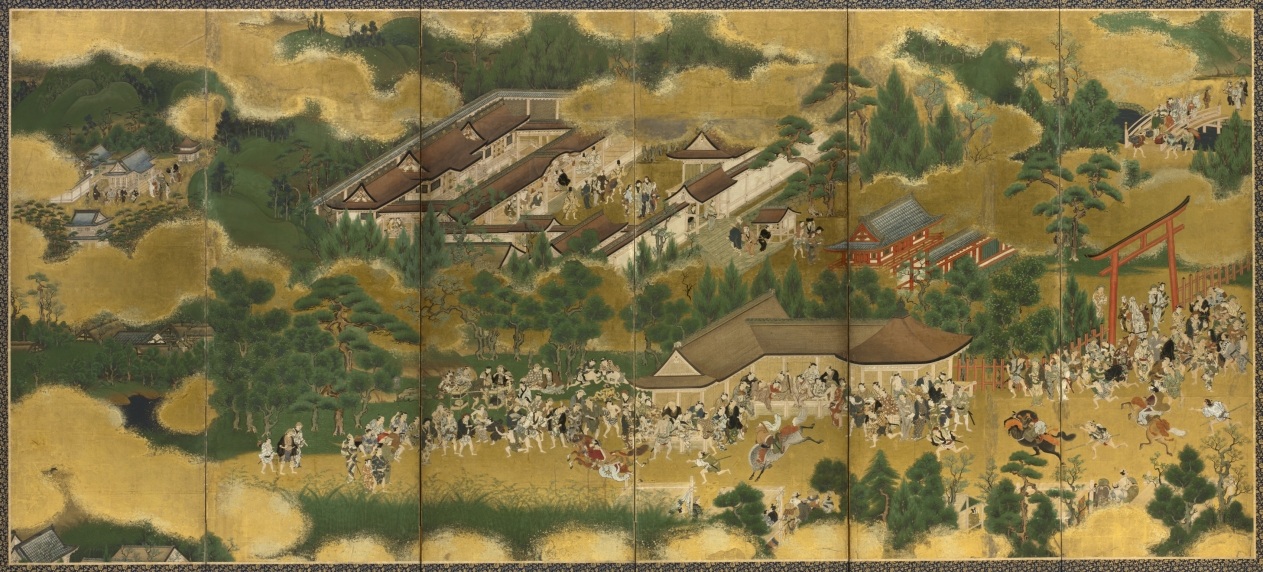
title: Horse Race at the Kamo Shrine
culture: Japan, Edo period (1615–1868)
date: early to mid-1600s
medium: One of a pair of six-panel folding screens; ink and color on gilded paper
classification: Painting